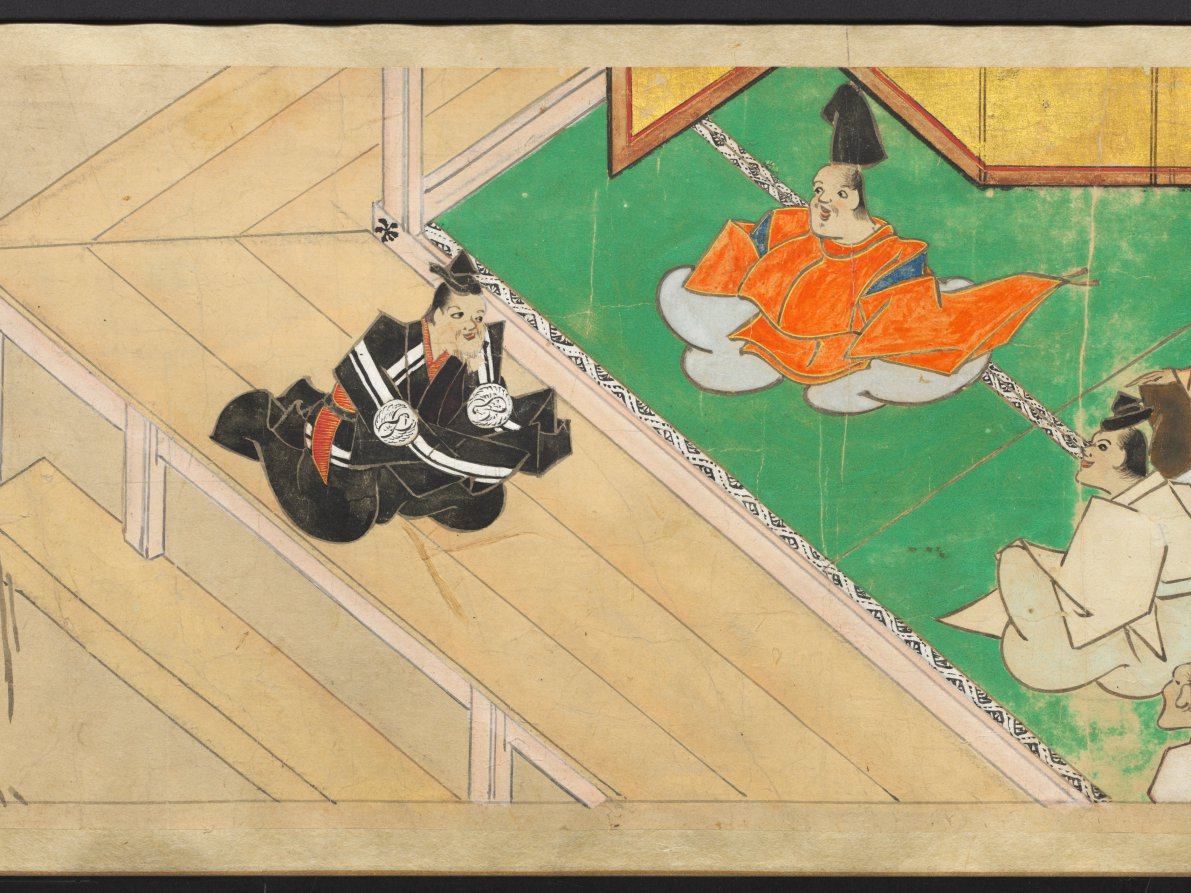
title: The Saltmaker's Story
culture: Japan, Edo period (1615–1868)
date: early 1600s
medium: One of a pair of handscrolls; ink, color, and gold on paper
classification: Painting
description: Once read and copied by girls at New Year’s celebrations and included in dowries, The Saltmaker’s Story is a rags-to-riches tale in which daughters are gifts from the gods. Despite his simple outlook, the main character progresses from humble roots as an associate at Kashima Shrine to the elite status of grandfather of the emperor through the intervention of the Kashima deity. The Saltmaker’s Story is traditionally presented in a set of three scrolls, but the text of this set has been removed by a previous owner, who remounted the illustrations as a pair. The paintings of this one take us from right to left through the first half of the tale.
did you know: This handscroll originally had texts before its paintings, but the texts were removed.